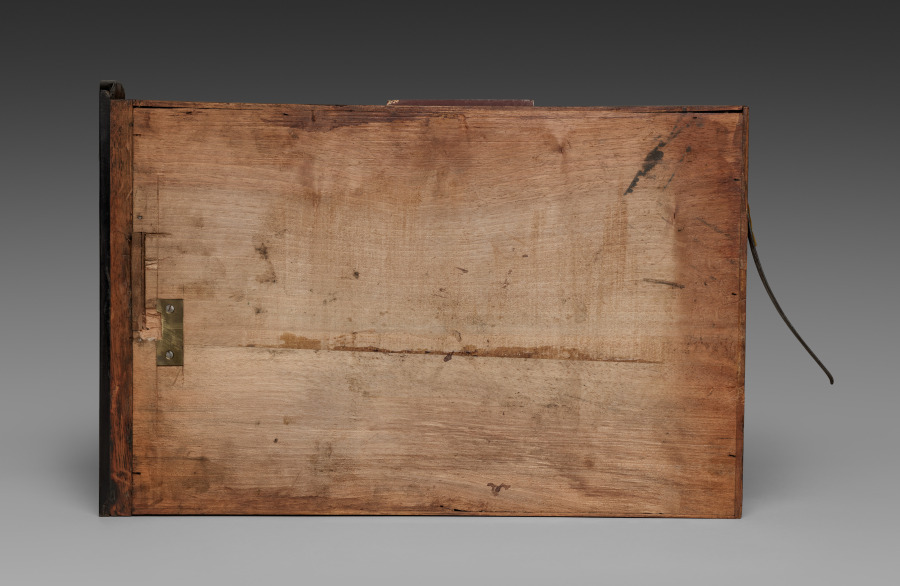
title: Drawer for Cabinet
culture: France, late 17th Century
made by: André-Charles Boulle (French, 1642–1732)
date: c. 1690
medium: ebony, marquetry in metal and tortoiseshell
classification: Furniture and woodwork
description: Appointed cabinetmaker to King Louis XIV in 1672, André-Charles Boulle became a master of furniture making in France during the late 1600s until his death in 1732. Known primarily for his use of marquetry, in which metal patterns are inlaid into tortoiseshell then applied within the veneered surface of the furniture, Boulle established a level of quality and craftsmanship few others could achieve. As a result, his work found favor at the royal court and among other aristocrats and diplomats eager to impress the king. The inclusion of a medallion depicting Louis XIV within the bronze decoration of this chest would have identified the owner with the royal court. Often exhibiting stout architectural proportions with elegant groups of inlaid motifs such as the parrot on the central panel of this chest, Boulle’s designs are an example of the intellectual fashion for contrasting ideas, materials, and motifs.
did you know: Originally designed to sit atop an elaborate tall stand, this chest was likely altered in the late 1700s to reduce its scale and height.